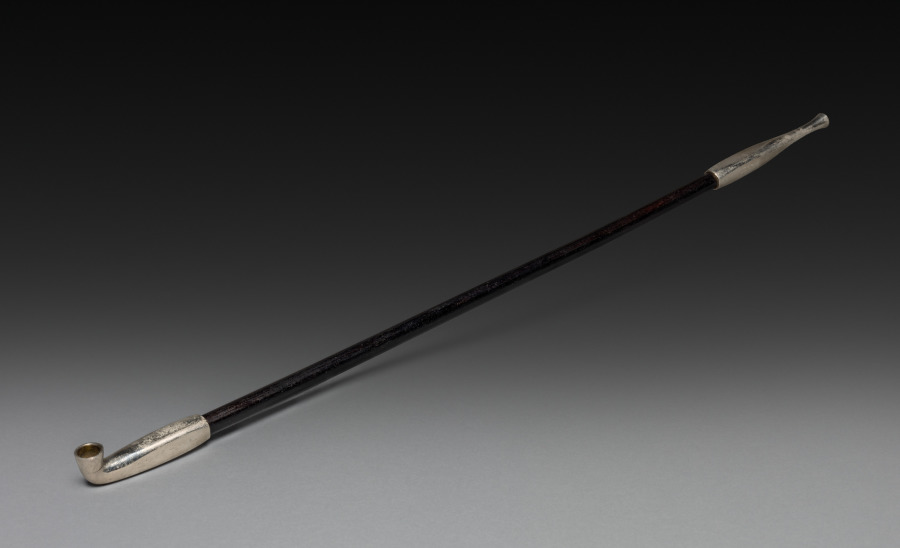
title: Tobacco Pipe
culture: Japan, Edo period (1615–1868)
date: early to mid-1800s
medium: wood and metal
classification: Miscellaneous